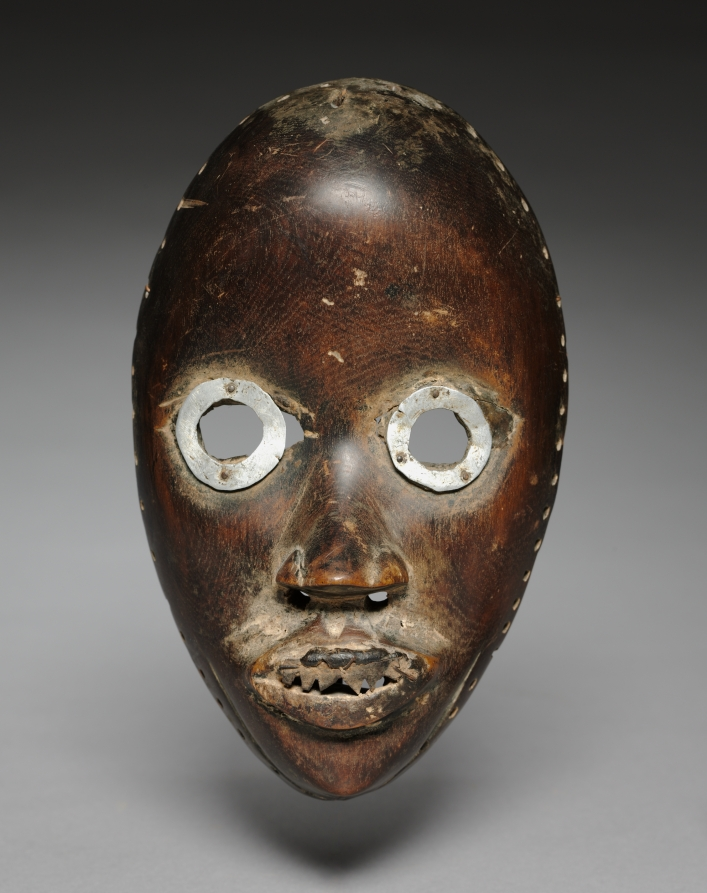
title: Face Mask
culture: Africa, West Africa, Côte d'Ivoire or Liberia, Dan-style maker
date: possibly early 1900s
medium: Wood, metal, leather, and organic materials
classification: Mask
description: A Dan face mask's use and the costume that accompanied it are important elements that contribute to the name it receives. While we don't know those details, we can say it originally had an elaborate fiber hairstyle attached through the holes around the edge. Based on its appearance and other similar examples, this face mask with a high forehead in northern Dan style may have been called either sagbwe or gunyege. As a "runner mask," it was engaged in running competitions once organized every Sunday during the dry season. As a "fire-watcher," its main task was to protect the village from fire when the dangerous desert wind called Harmattan blew during the dry season.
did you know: The eyes of this mask were altered from slits to circles; the original shape is most visible on the right eye.